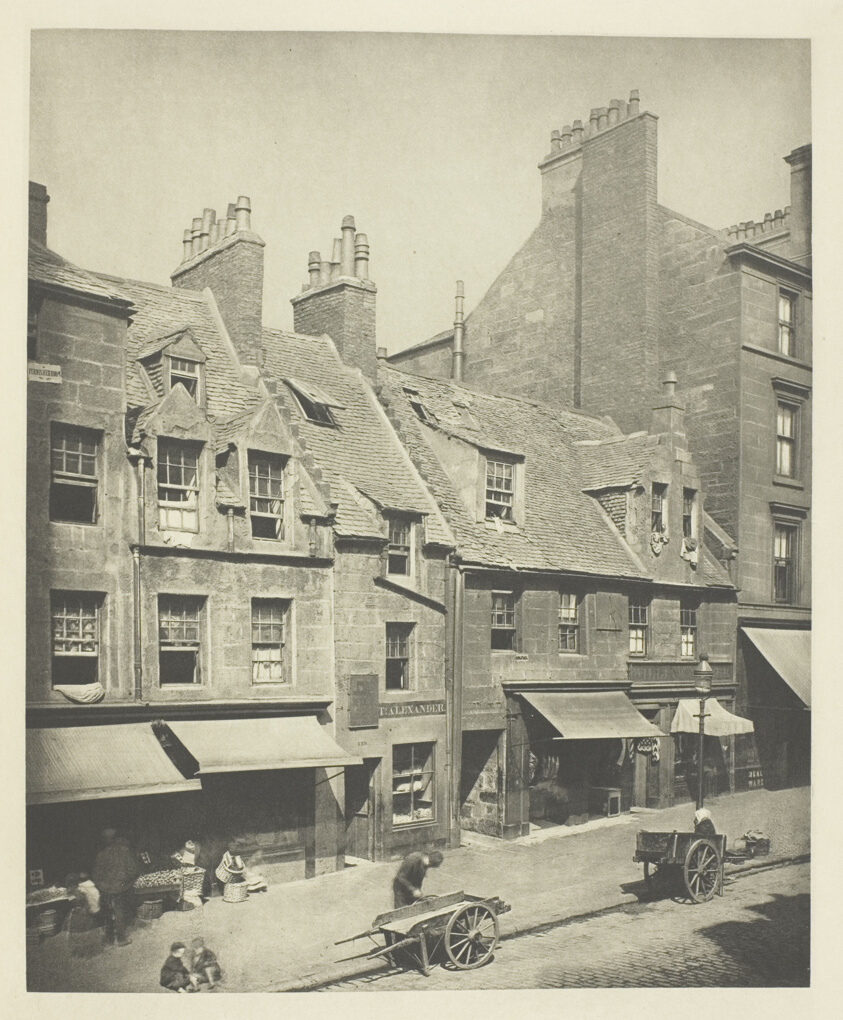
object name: Photograph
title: Gallowgate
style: 19th century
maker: Thomas Annan (Scottish, 1829–1887)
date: 1868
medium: Photogravure, plate 20 from the book "The Old Closes & Streets of Glasgow" (1900)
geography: Scotland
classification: photograph; photography